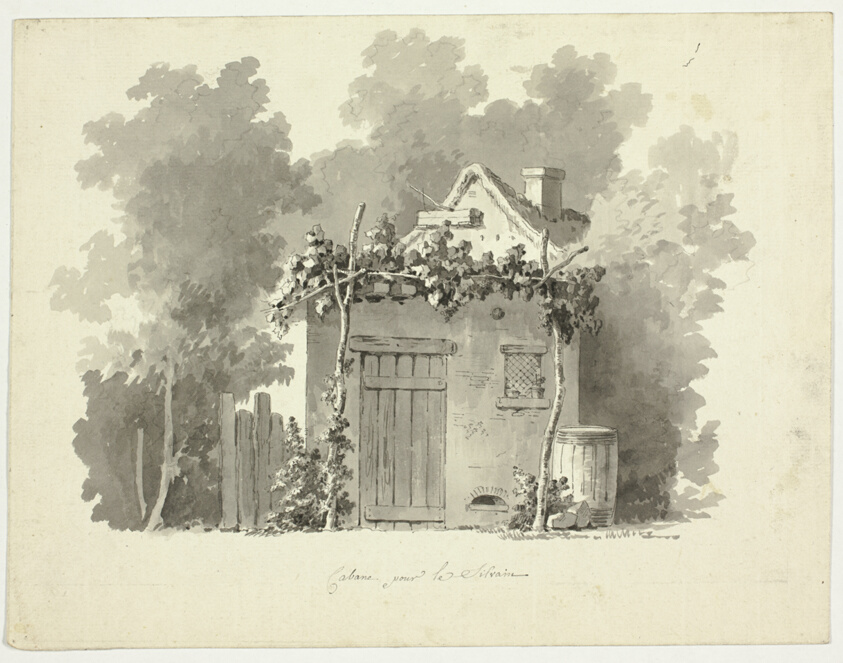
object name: Drawing and Watercolor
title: View of the Park at Versailles: Rustic Cabin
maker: Pierre Antoine Mongin (French, 1761/62-1824/27)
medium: Pen and black ink and brush and black and gray wash, with black chalk, on cream laid paper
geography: France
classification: ink or chalk wash; drawings (visual works); prints and drawing